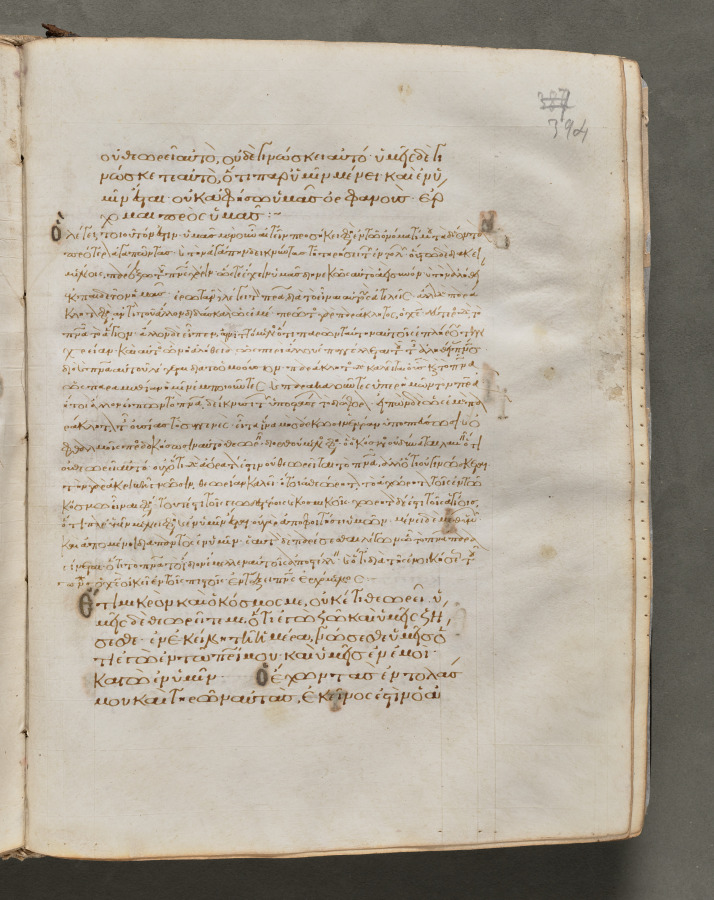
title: Text, folio 394 (recto), from a Gospel Book with Commentaries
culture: Byzantium, Constantinople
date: c. 1000–1100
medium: ink, tempera, and gold on vellum; leather binding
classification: Bound Volume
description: Each of the four gospels in this book opens on a page with brilliantly illuminated borders depicting the author of the text as well as birds—principally peacocks, symbols of the immortality of the soul—and fountains, representing the fountain of life and the salvation of the soul. This volume consists of 428 leaves with texts in Greek. Its level of sophistication suggests that it was probably written and decorated in a monastery in Constantinople.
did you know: Gospel books were carried in procession through Byzantine churches.